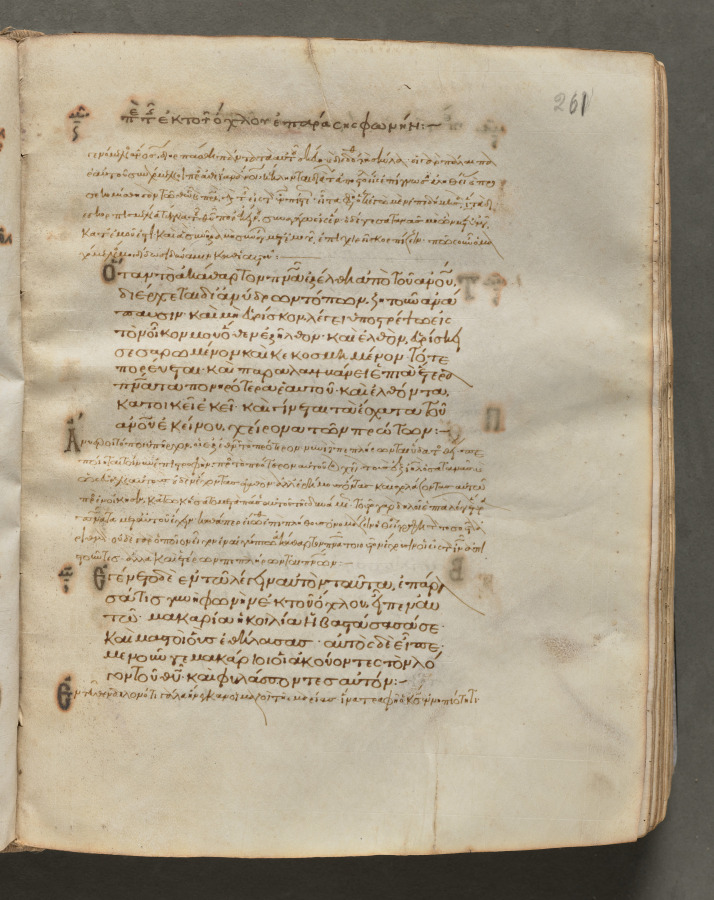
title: Text, folio 261 (recto), from a Gospel Book with Commentaries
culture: Byzantium, Constantinople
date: c. 1000–1100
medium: ink, tempera, and gold on vellum; leather binding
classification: Bound Volume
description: Each of the four gospels in this book opens on a page with brilliantly illuminated borders depicting the author of the text as well as birds—principally peacocks, symbols of the immortality of the soul—and fountains, representing the fountain of life and the salvation of the soul. This volume consists of 428 leaves with texts in Greek. Its level of sophistication suggests that it was probably written and decorated in a monastery in Constantinople.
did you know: Gospel books were carried in procession through Byzantine churches.